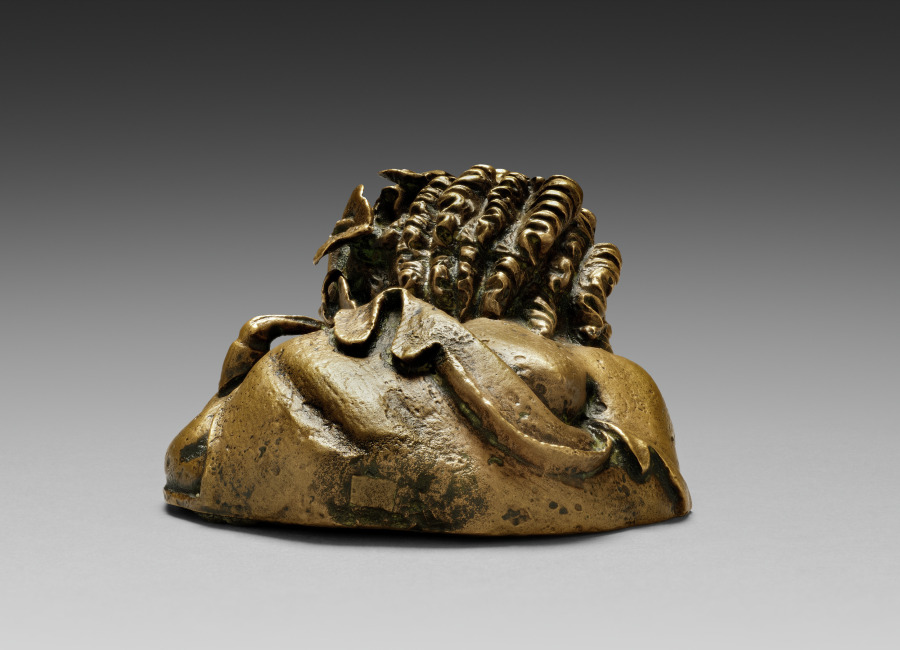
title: Silenus Bust for a Couch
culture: Italy, Roman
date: 1–125 CE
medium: bronze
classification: Sculpture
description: This bust of Silenus was part of the fulcrum or armrest of an ancient Roman couch. Silenus was the tutor and companion of Bacchus, the Roman god of wine. He is shown with a long curly beard, bushy eyebrows, and wearing a garland of ivy vines with berries. His deerskin robe, tied by the animal’s hoof, falls off his shoulder, suggesting drunkenness. The bust would have been placed at the base of the armrest where it met the seat of the couch, while an animal head likely decorated the top. As is the case with many Roman objects, Romans adapted their couch style and decoration from the Greeks.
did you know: This silenus’s beard is made up of exactly ten ringlets of curls.